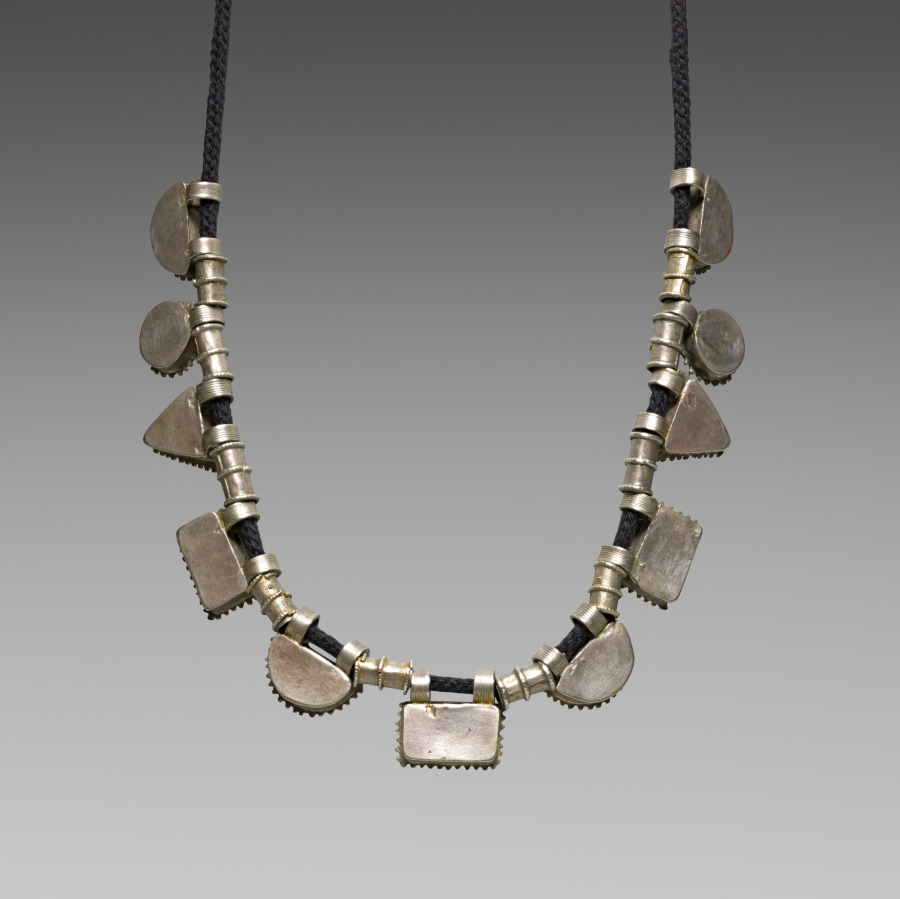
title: Necklace (ashän ketab) with amulet pendants (tälsäm)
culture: Africa, East Africa, Ethiopia, unknown silversmith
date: late 1800s or early 1900s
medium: silver alloy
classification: Jewelry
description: Ornate filigree jewelry was historically made in Ethiopia for royals and nobility by specialized silversmiths trained through long apprenticeships. This silver necklace is composed of numerous box-shaped amulet pendants (tälsäm) meant to ward off the evil eye or other dangers. Linked to Islamic amuletic practices, the boxes are effective whether empty or whether they contain magical or prayerful texts. Their fine filigree and granulation work is characteristic of Harar as well as the Ethiopian Orthodox Christian city of Aksum.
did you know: Ethiopian silver jewelry is made by melting high-purity Maria Theresa thaler coins made from the 1700s to the 1900s.